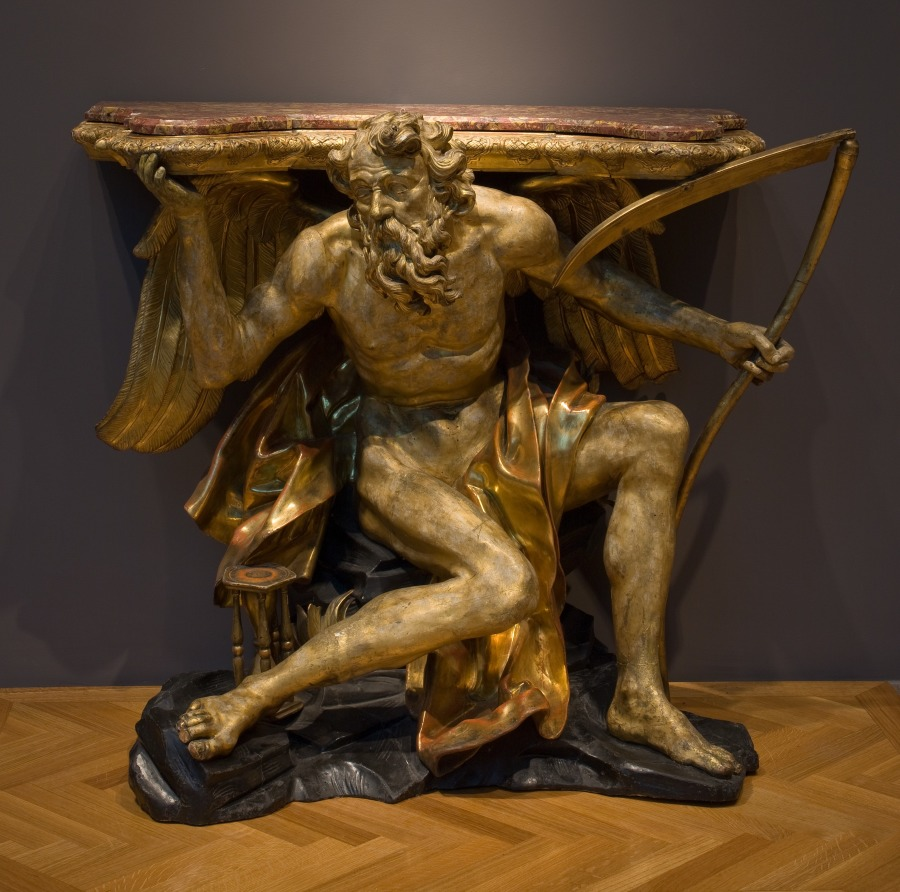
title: Console Table Depicting Chronos, or Father Time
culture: Italy, probably Rome, late 17th-early 18th Century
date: c. 1700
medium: painted and gilded wood, marble top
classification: Furniture and woodwork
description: The marble tabletop is supported by a gilded wooden figure of Father Time (or “Chronos”) adorned with his typical attributes of wings, a scythe, and an hourglass. The metaphorical weight of his eternal role is emphasized as he bears the heavy stone slab on his shoulders while reaching up to ensure its balance.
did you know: Father Time’s scythe symbolizes natural cycles, like the harvest, and time's unstoppable flow that cuts down all living things.